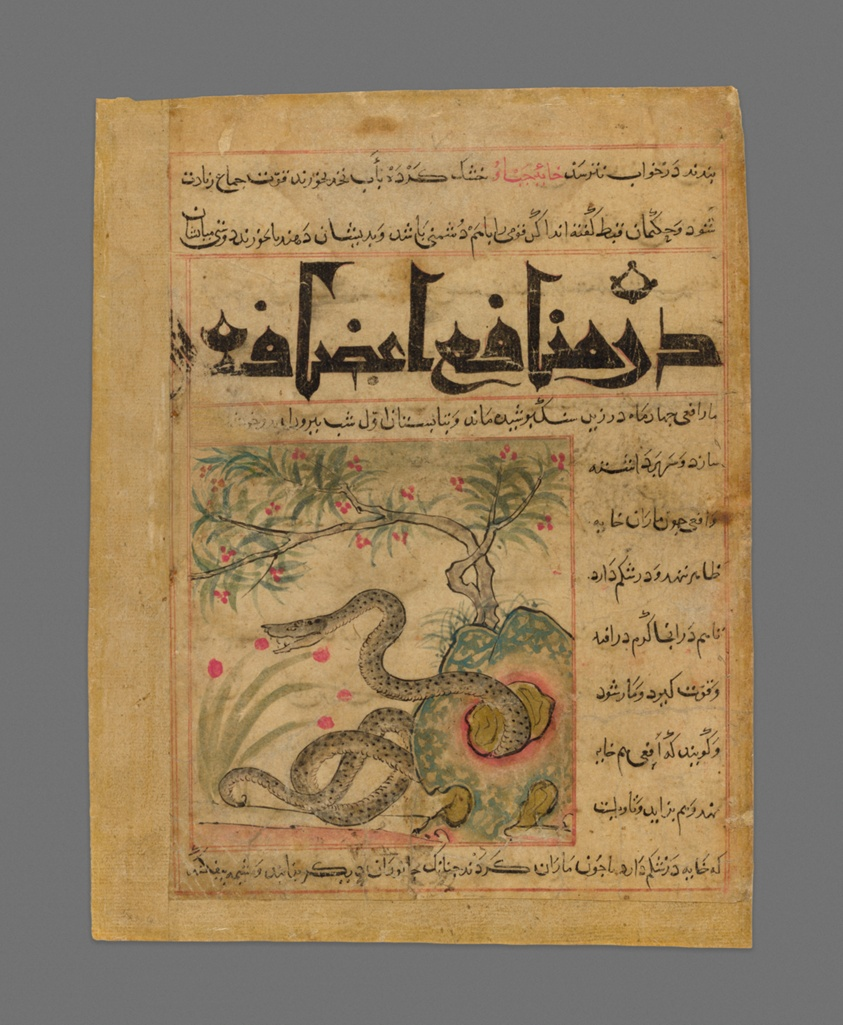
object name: Drawing and Watercolor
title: Viper in a Rocky Garden from Manafi' al-Hayawan (On the Usefulness of Animals) of Ibn Bakhtishu'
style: Islamic (culture or style)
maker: Iran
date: c. 1300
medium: Opaque watercolor and ink on paper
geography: Iran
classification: painting; manuscript; asian art